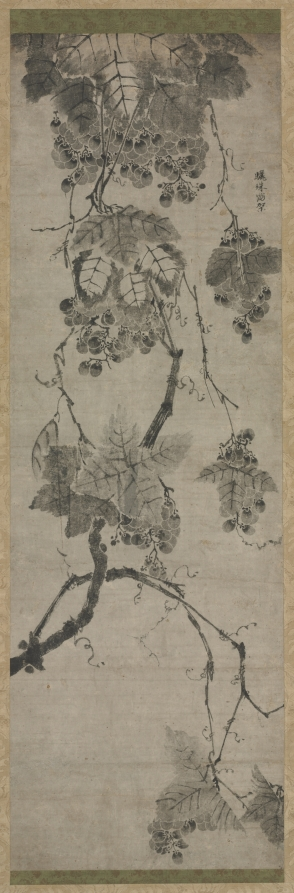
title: Grapes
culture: Japan, Edo period (1615–1868)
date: 1615–1868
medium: hanging scroll; ink on paper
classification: Painting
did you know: The amateur painter of this work attempted to follow the model of grapevine paintings produced in Korea.